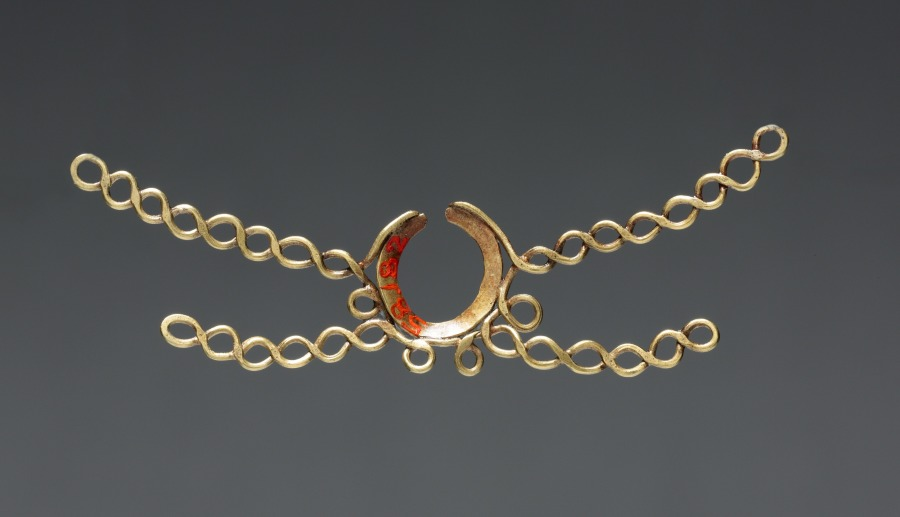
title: Nose Ornament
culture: Peru, Northern Highlands, Chavín de Huantar(?), Chavín style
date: c. 500–200 BCE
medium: hammered and cut gold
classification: Metalwork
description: There seems to be a link between Chavín religion and appearance of the Andes’ first large precious-metal objects, made using revolutionary new metallurgical processes. Chavín may have developed these technical innovations to express the inexpressible, the "wholly other" nature of its religion. In many areas, elite men and women wore the ornaments as emblems of their ties to this religion, and eventually were buried with them. These 16 objects, along with three others not in the museum’s collection, are said to have come as a group from Chavín itself.